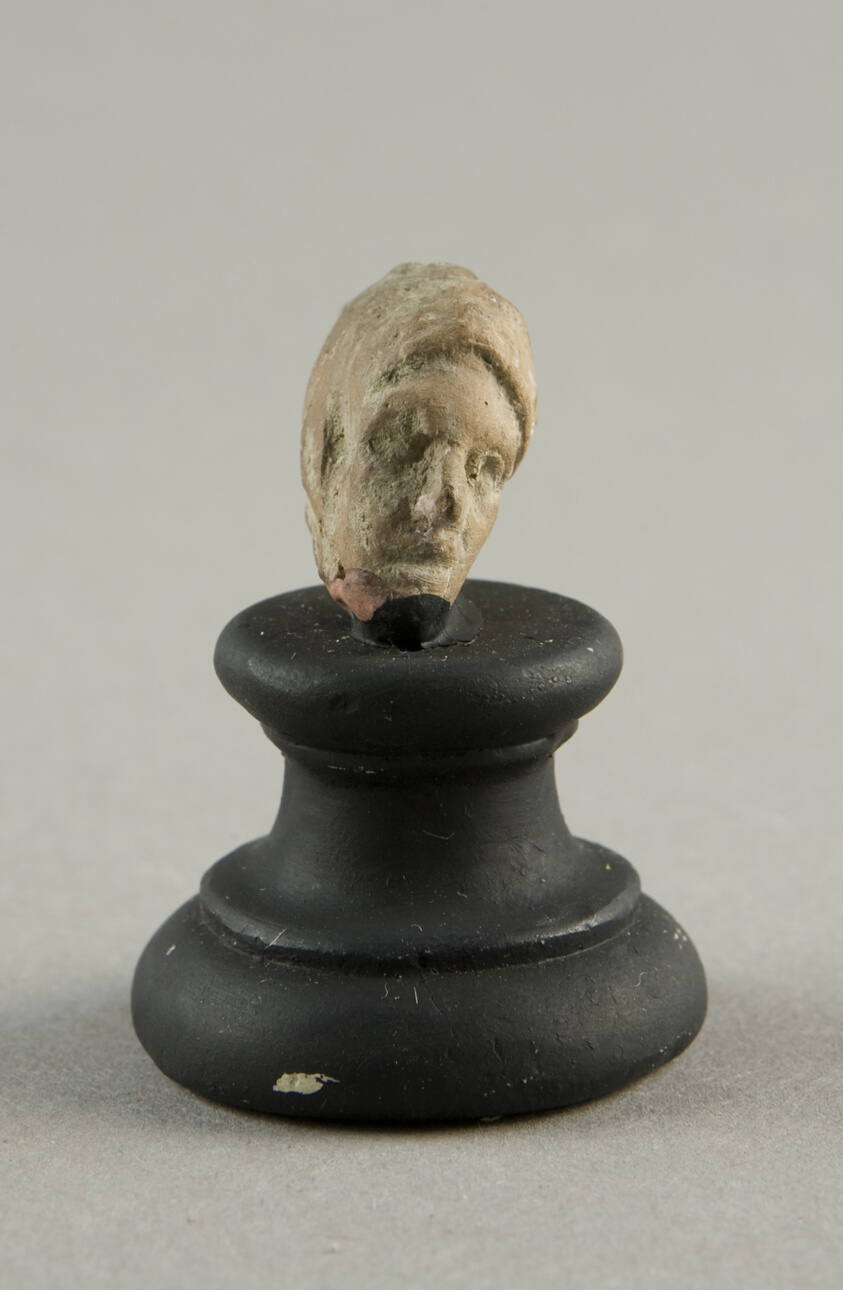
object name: Sculpture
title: Head of a Man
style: greek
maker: Greek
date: 3rd-1st century BCE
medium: terracotta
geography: Greece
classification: earthenware; ceramics; sculpture; ancient art